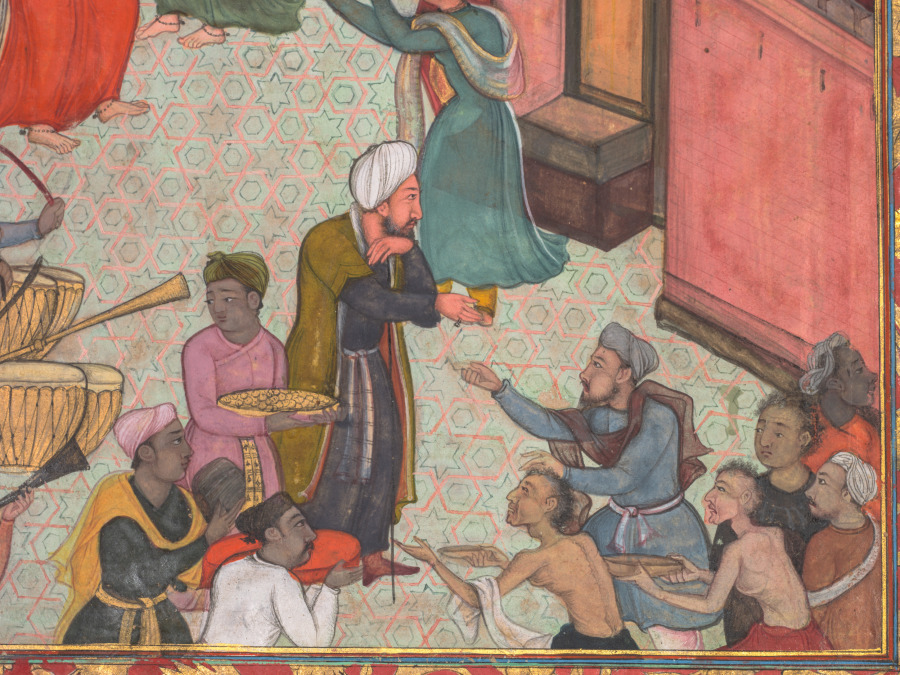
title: Circumcision ceremony for Akbar’s sons, painting 126 from an Akbar-nama (Book of Akbar) of Abu’l Fazl (Indian, 1551–1602)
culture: Mughal India, court of Akbar (reigned 1556–1605)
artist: attributed to Dharam Das (Indian, active c. 1580–1605)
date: c. 1602–3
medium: gum tempera, ink, and gold on paper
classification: Painting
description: This page is from a copy of the biography of Akbar that was completed not long before his death in 1605. It depicts him much younger, during the festivities held on October 22, 1573, in his newly built capital city of Fatehpur Sikri, near Agra, on the occasion of the circumcision ceremony for his three young sons. Dancers in Chaghatai Turkish dress perform as Akbar’s weight in gold is being distributed to the poor. Akbar wears a simple white tunic, or jama, stained at the armpits by aromatic musk. A curved dagger in a red velvet sheath is tucked into his golden sash, and he is crowned with a white crested turban.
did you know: An attendant strokes Akbar’s hunting falcon, perched on a glove.